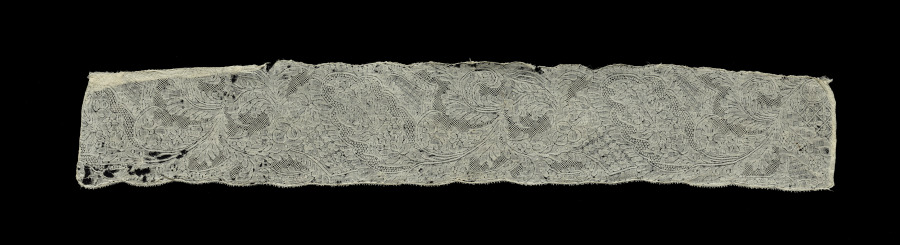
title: Fragment of a Lace Lappet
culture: Belgium, Binche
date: 1700–1720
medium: Bobbin lace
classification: Lace